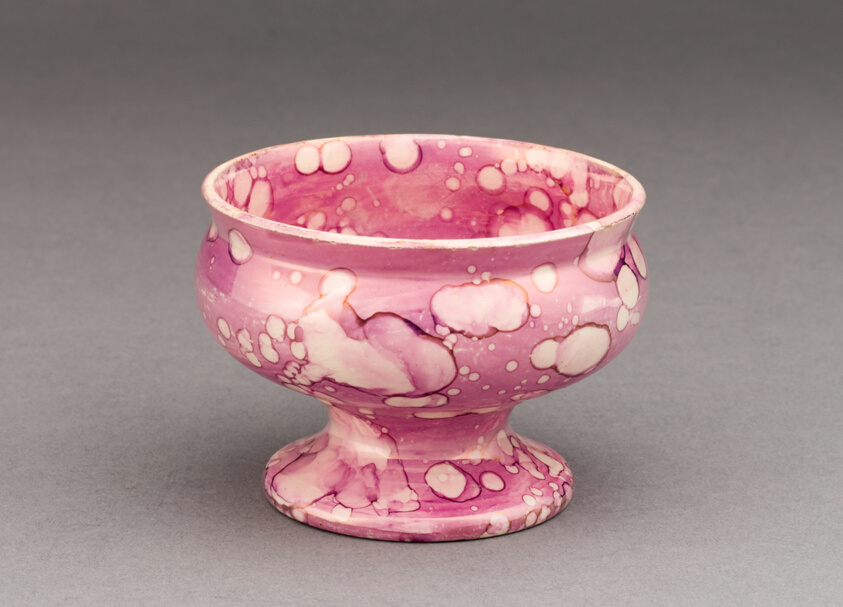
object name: Ceramics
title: Salt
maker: England, Sunderland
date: 1810/20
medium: Earthenware with purple lustre decoration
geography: Sunderland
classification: earthenware; ceramics; european decorative arts